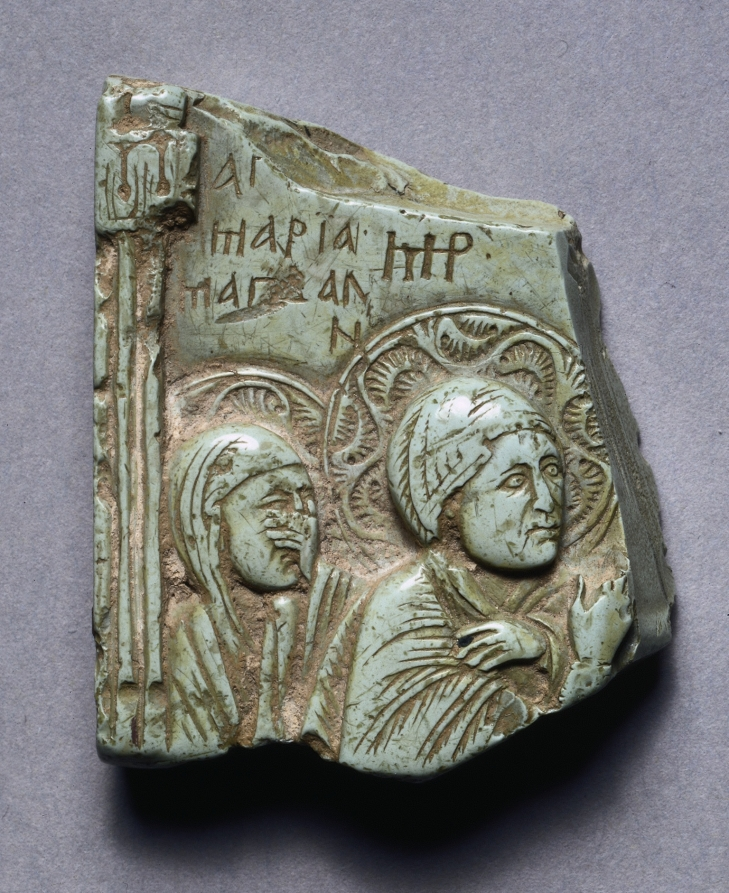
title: Fragment of an Icon of the Crucifixion with Mary Magdalene and the Virgin Mary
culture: Byzantium, Byzantine period, 14th century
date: 1300s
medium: steatite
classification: Glyptic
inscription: partial inscriptions above the figures.